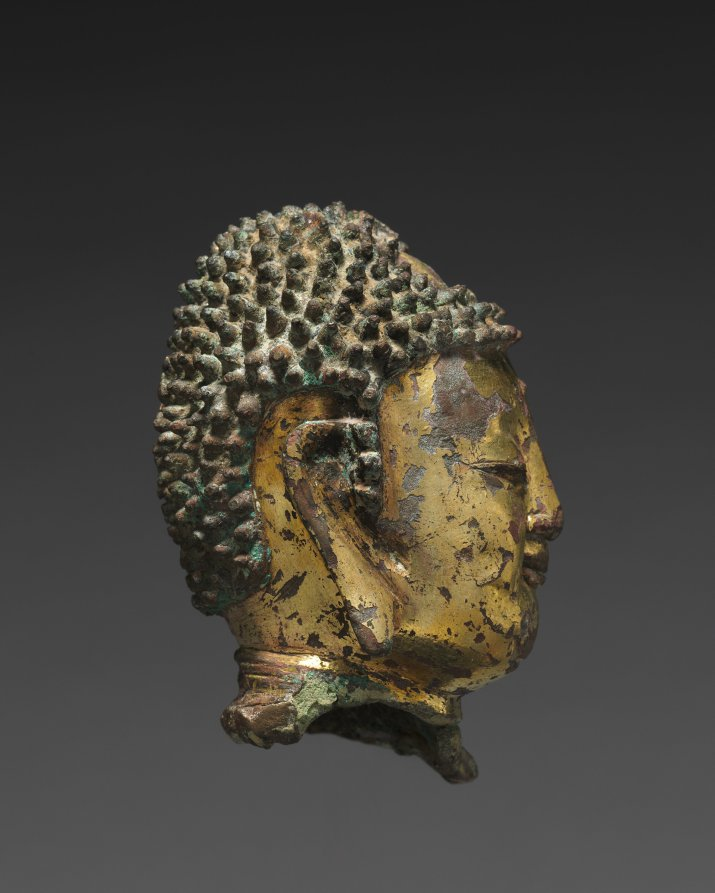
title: Head of Buddha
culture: Korea, Goryeo dynasty (918–1392)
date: 900s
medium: gilt bronze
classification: Sculpture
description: While large Buddhist statues were made mostly in stone during the Goryeo period (918–1392), small ones were made in gilt bronze, as a portable object of devotion by traveling Buddhist monks.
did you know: A gentle smile crossing the Buddha's face here is a sign of compassion.